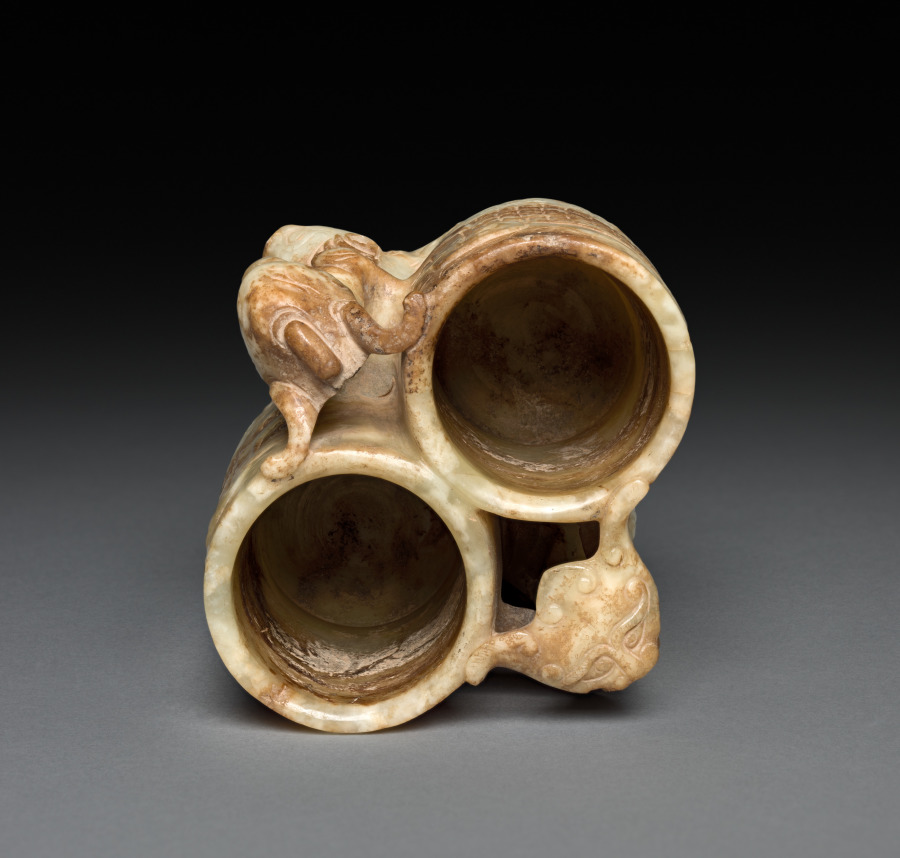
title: Champion Vase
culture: China, Song dynasty (960-1279) - Ming dynasty (1368-1644)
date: 960– 1279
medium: jade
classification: Jade